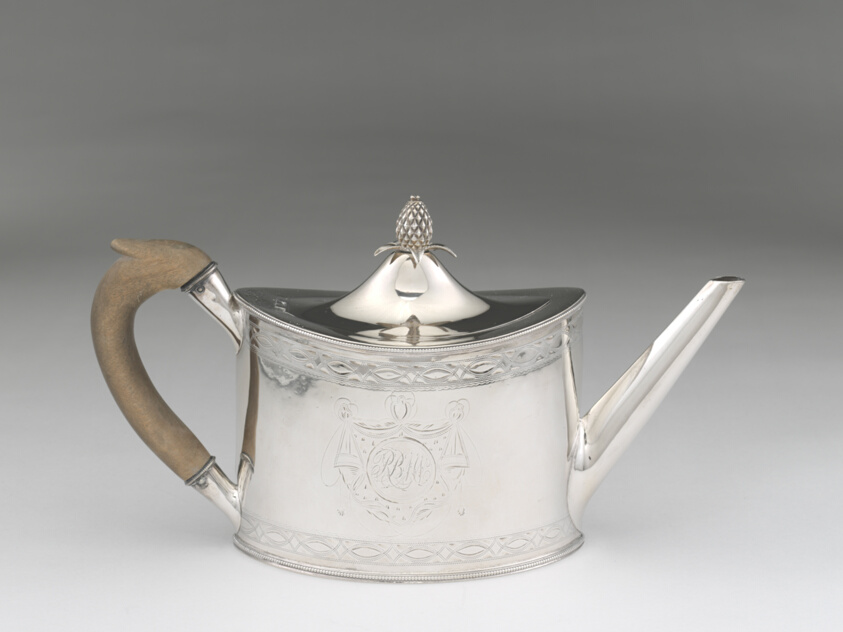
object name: Metalwork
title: Teapot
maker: Daniel Van Voorhis; American, 1751–1824; New York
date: c. 1793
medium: Silver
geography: New York City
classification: teapot; silver; american decorative arts; american arts; decorative arts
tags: dining, drinking